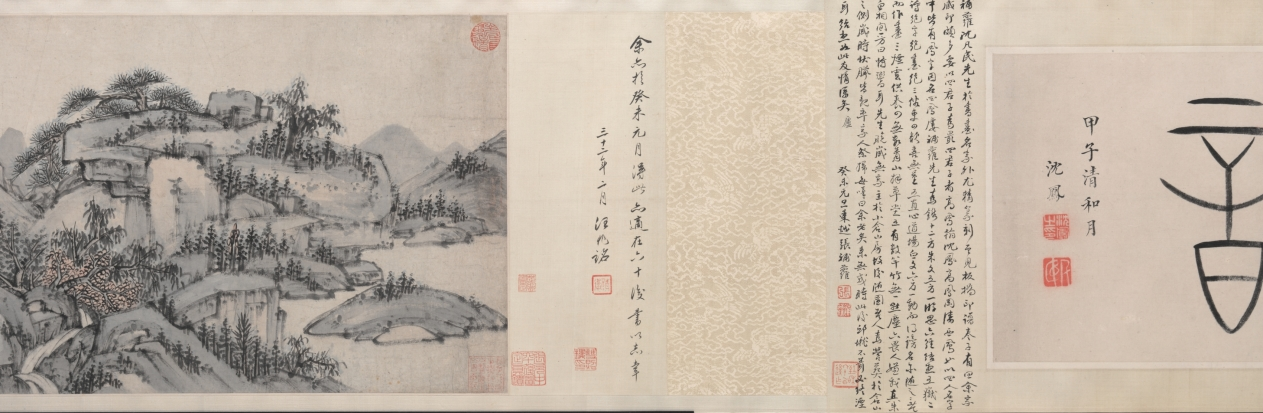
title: Pure Tones among Hills and Waters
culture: China, Qing dynasty (1644-1911)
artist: Xiao Yuncong (Chinese, 1596–1673)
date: 1664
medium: Handscroll; ink and light color on paper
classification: Painting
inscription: 種松發秀色，具是高人心。/ 鑿石築茅屋，長年覆綠陰。/ 白雲無意出，舒卷趨空林。/ 萬籟時一寂，微風墮清音。/ 此情莫可擬，此景誰能論。/ 只向千峰裏，共彈五絃琴。/ 桃花依綠水，不覺又春深。 甲辰花朝題于青蓮閣, 鐘山老人蕭雲從。[印] 鐘山老人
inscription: Title and inscription, dated 1744, and 3 seals of Shen Feng 沈鳳 (1685-1755).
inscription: 4 colophons and 24 additional seals: 1 colophon, dated 1811, and 5 seals of Xiang Yuan 項源 (active about 1811); 1 colophon, dated 1858, and 2 seals of Qi Junzao 祁寯藻 (1793-1866); 1 colophon and 4 seals of Zhang Yunzhong 張允中 (1881–1960?); 4 seals of Jiang Xun 江恂 (active about 1753–after 1780); 1 colophon dated 1943, and 2 seals of Wang Shaoming 汪兆銘 (Wang Jingwei 汪精衛, 1883–1944); 1 seal of Qi Zhiliu 祁之鏐 (active about 1858); 2 seals of Yu Zhimeng 俞芷盟 (second half of 19th century); 4 seals unidentified.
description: Painted at age 68, this landscape is one of Xiao Yuncong’s most mature works. Extraordinary in its combination of fine details with bold brushstrokes and bluish washes, it is also one of his longest compositions in handscroll format, extending over 23 feet. Throughout his lifetime, Xiao visited Nanjing and Yangzhou, where he met with other painters and literati. Regarded as the founder of the Gushu school (姑孰派) of painting, Xiao painted from nature, and his landscapes are informed by his travels, as well as by his experience as a print designer.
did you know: Biographical notes on Xiao Yuncong relate that he did not pursue the career of an official, but "furnished a cottage in the eastern suburbs [of Wuhu in Anhui province] and amused himself playing the qin (zither) and reading every day."